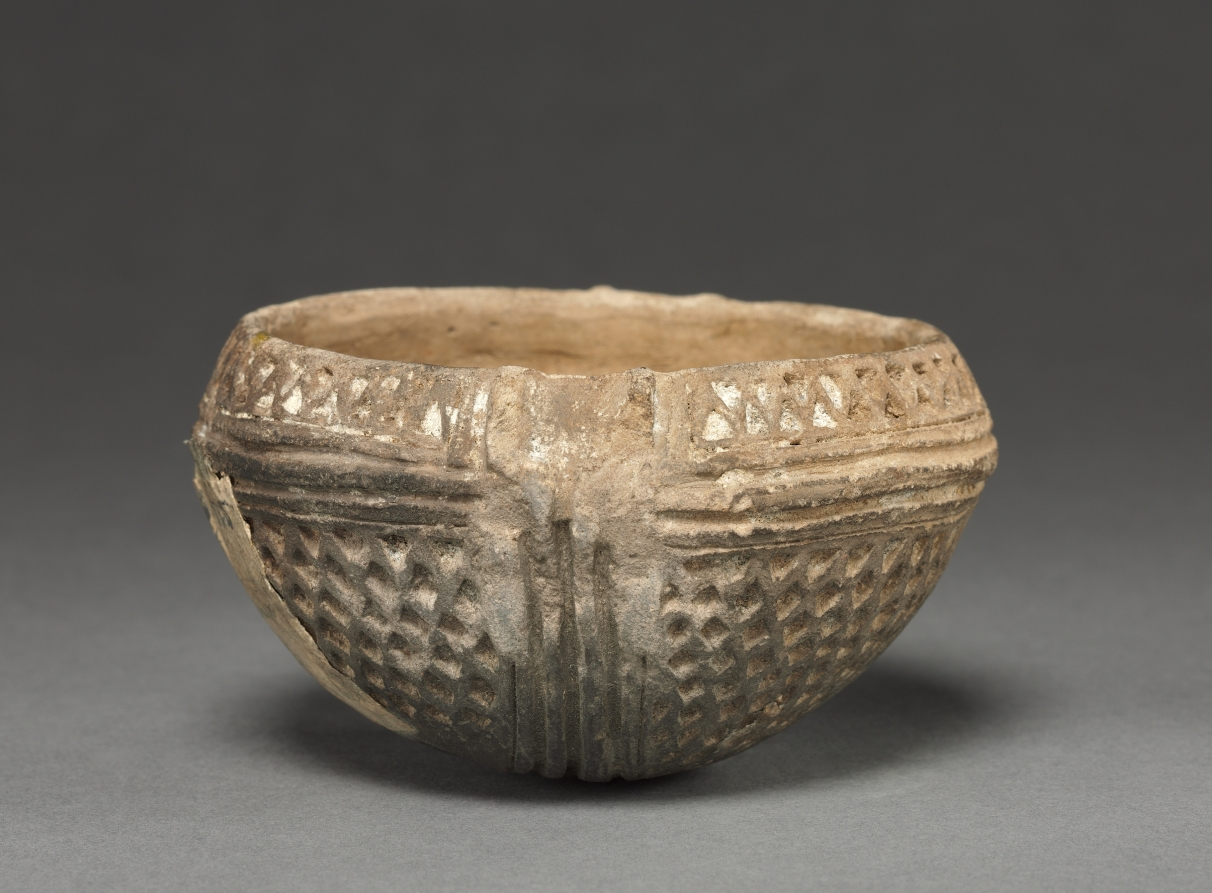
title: Jar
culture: Colombia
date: before 1550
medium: red ware with incised patterns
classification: Ceramic